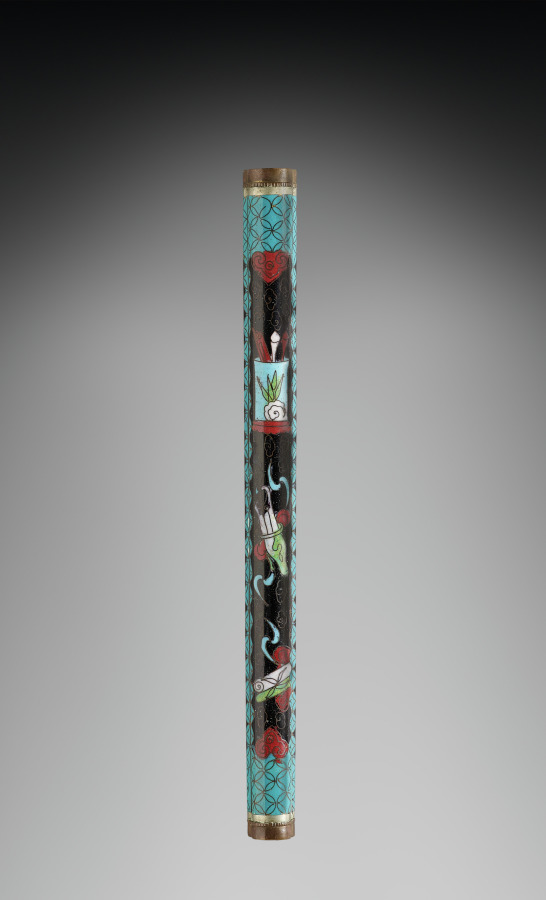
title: Case for Kit with Chopsticks and Knife - Souvenir Trade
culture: Japan, Meiji period (1868–1912) to Taishō period (1912–26)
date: early 1900s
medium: enamel, wood, walrus ivory or bone, metal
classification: Implements